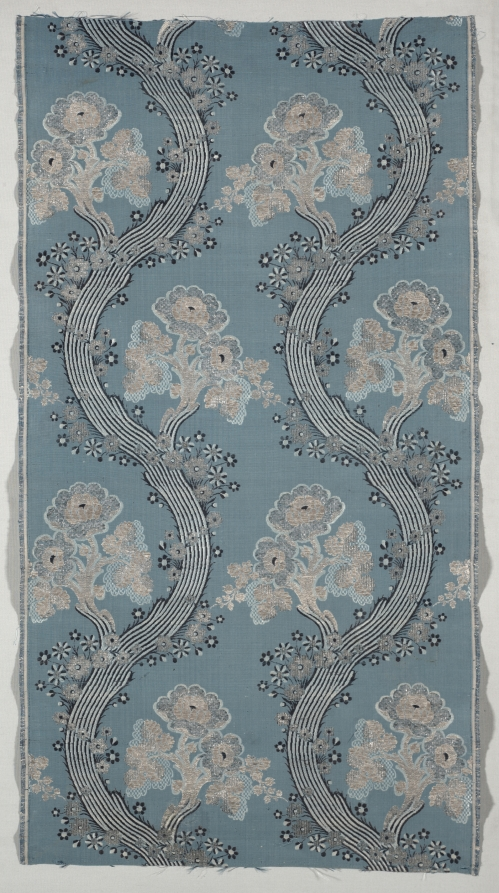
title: Length of Textile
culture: France, 18th century, Period of Louis XV (1723-1774)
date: 1723–1774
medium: brocade; silk and metal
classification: Textile